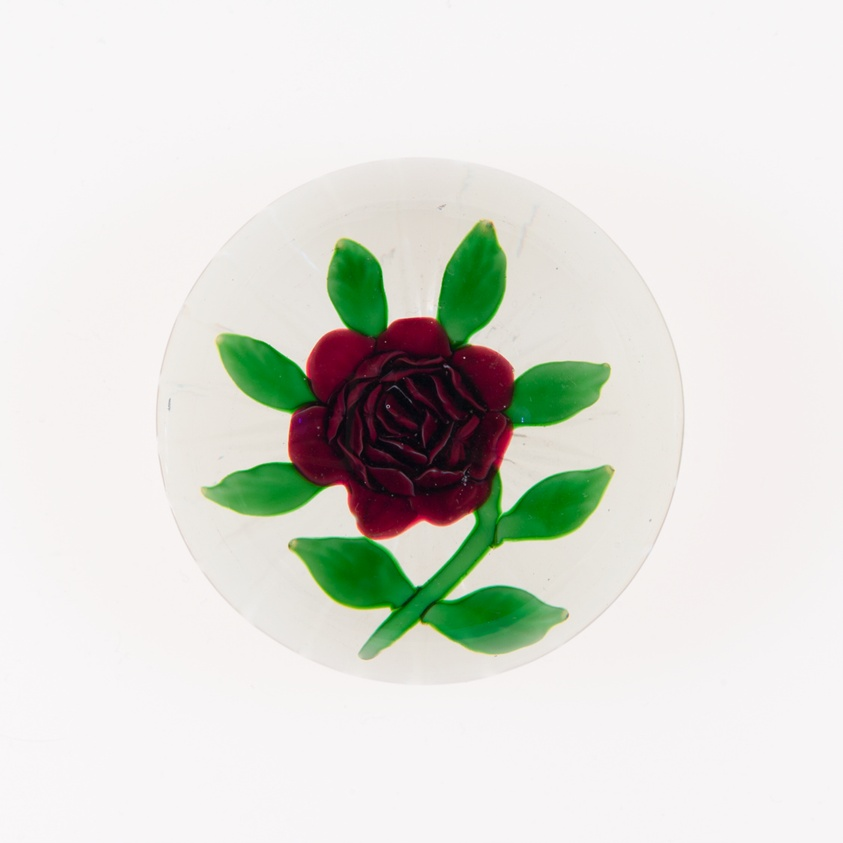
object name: Glass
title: Paperweight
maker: Baccarat Glassworks (Cristalleries de Baccarat); Lorraine, France, founded 1764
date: 19th century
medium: Glass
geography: Lunéville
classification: paperweight; lampwork; european decorative arts; glass